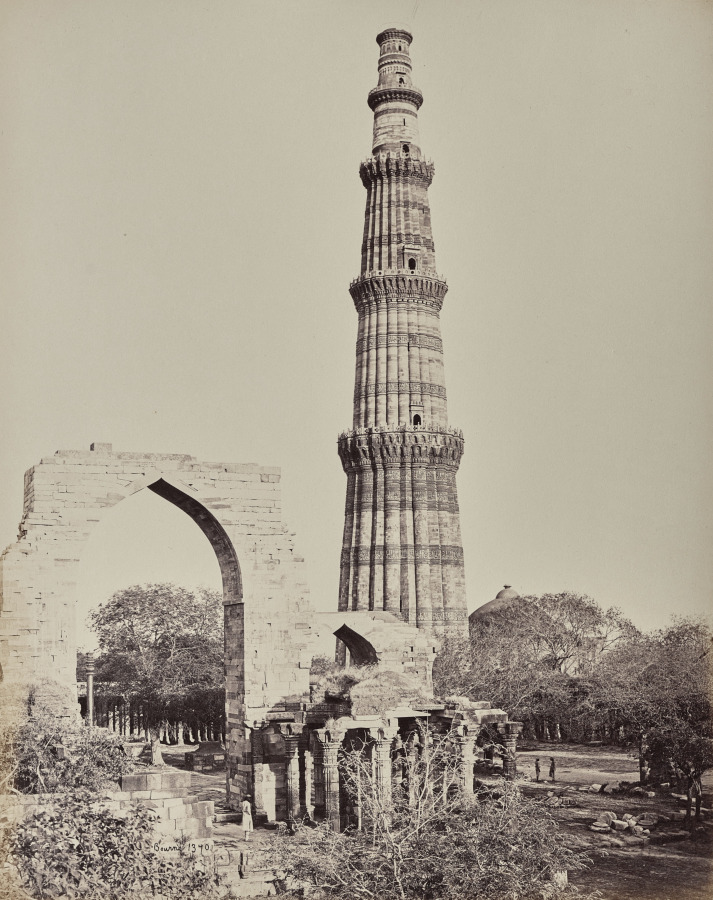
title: Delhi. The Kootub Minar or Tower in the Ruined City of Old Delhi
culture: England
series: Photographs of Northern India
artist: Samuel Bourne (British, 1834–1912)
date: 1863–70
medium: albumen print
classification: Photograph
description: The 50 images in this album, all taken in the 1860s, move from the hill towns of the Himalayas down to cities including Lahore (now in Pakistan), Delhi, Lucknow, Agra, Benares (now Varansi), and Calcutta (now Kolkata). Architectural studies of major monuments offer valuable historical records of what sites such as the Taj Mahal and the imperial mosque of the Mughal emperors in Delhi looked like before twentieth-century restorations.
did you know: Samuel Bourne, the author of most the images in this album, was a banker in England before he moved to India to become a professional photographer.